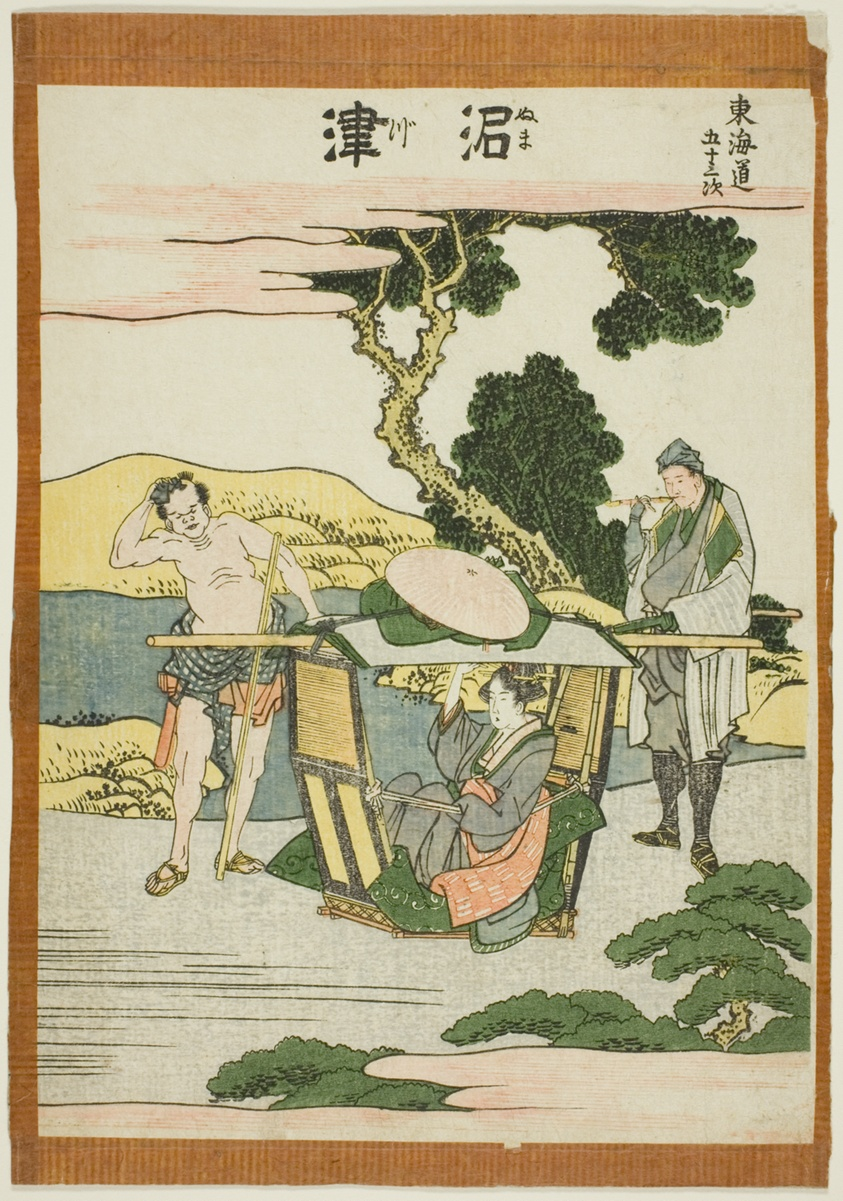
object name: Print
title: Numatsu, from the series "Fifty-three Stations of the Tokaido (Tokaido gojusan tsugi)"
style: Japanese (culture or style)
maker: Katsushika Hokusai 葛飾 北斎; Japanese, 1760-1849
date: c. 1806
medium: Color woodblock print; chuban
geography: Japan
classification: woodblock print; print; asian art